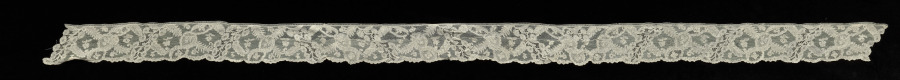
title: Lace Edging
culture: Italy, Burano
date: 1700s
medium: Linen: needle lace (Burano Point)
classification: Lace